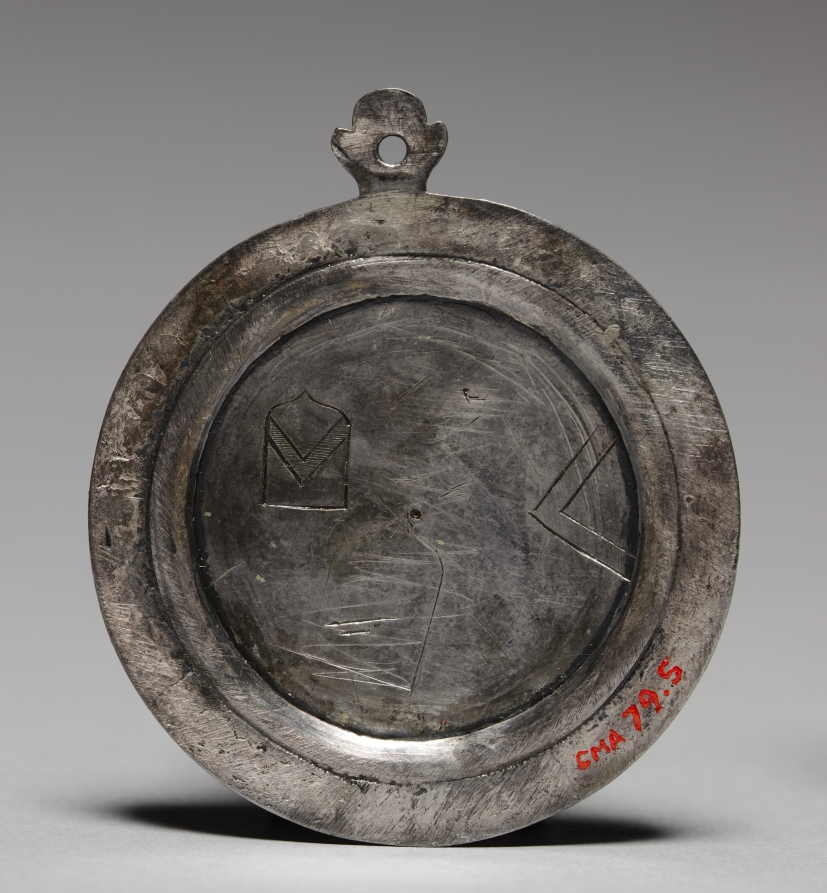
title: Medallion: The Last Supper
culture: France, 15th century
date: late 1400s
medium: basse-taille enamel on silver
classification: Enamel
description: The word enamel derives from the Old French esmail and the Old High German smelzen, meaning "to smelt." This is the most crucial process in the making of enamel. To prepare enamel, the constituents of glass (flint, or sand, as well as red lead, and soda or potash) are heated together to form a clear flux. To this a coloring agent (usually a metallic oxide) is added: copper for green, cobalt for blue, iron for red or brown. The enamel is then allowed to cool and solidify in slabs. Before use, each color is separately ground into a fine powder, placed on a prepared metal surface, and fired in a kiln. When cool, the surface is polished to remove any imperfections and add brilliance to the colors. The difference between the various enameling techniques lies chiefly in the methods used to prepare the metal surface for the enamel.